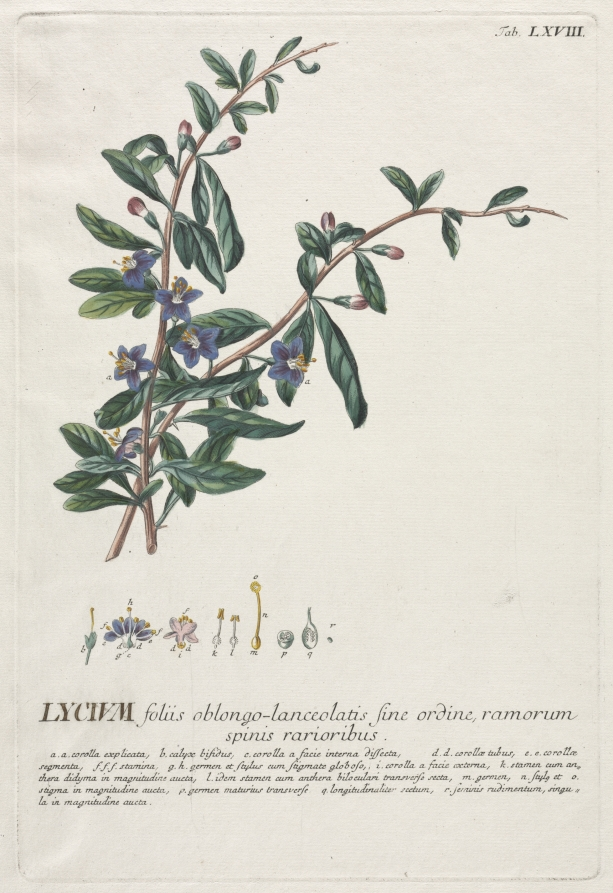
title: Plantae Selectae: No. 68 - Lycium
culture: Germany, 18th century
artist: Georg Dionysius Ehret (German, 1708–1770)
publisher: Christopher Jacob Trew (German, 1695–1769)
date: published 1750–73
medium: engraving, hand-colored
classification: Print